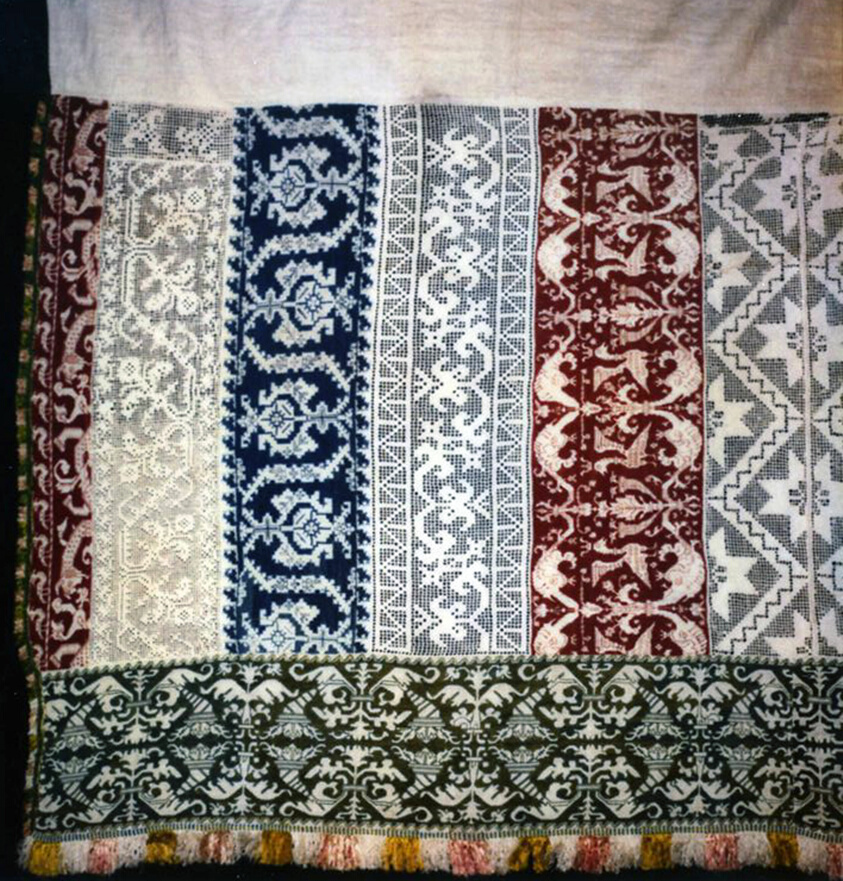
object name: Religious/Ritual Object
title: Altar Frontal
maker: Italy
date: Late 16th century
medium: Bands of linen, plain weave; linen, plain weave; pulled thread work; embroidered with silk in back, four-sided, overcast, running, single faggot, and two-sided Italian cross stitches; and linen, plain weave; pulled thread work; embroidered with linen in Russian overcast and cloth stitches; edged with linen and silk, plain weave extended weft uncut fringe and silk, buttonhole loops and bullion picots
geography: Italy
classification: textile; needlework (visual works); ritual objects